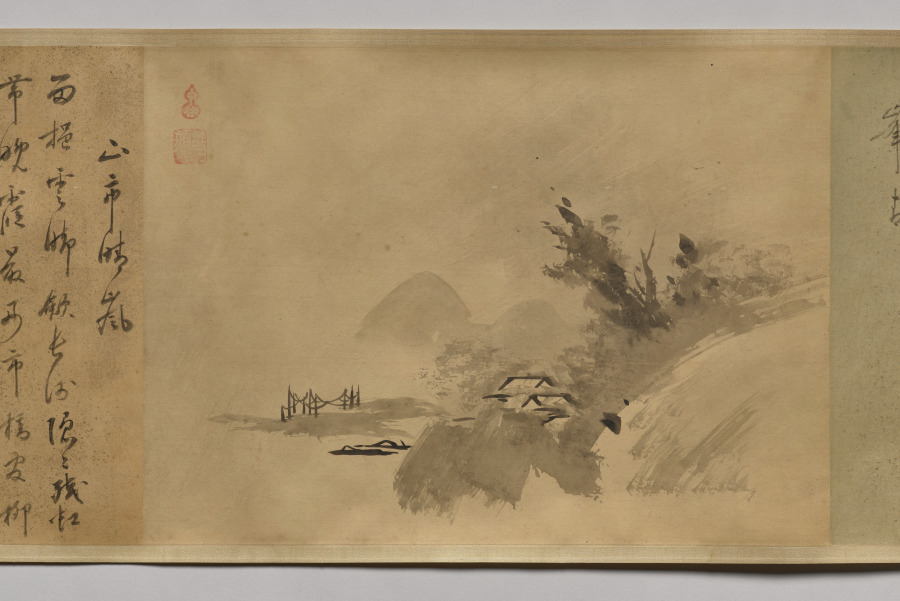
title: Poems and Pictures of the Eight Views of Xiao-Xiang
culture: Japan, Momoyama period (1573–1615)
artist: Unkoku Tōgan (Japanese, 1547–1618)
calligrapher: Inkei Gentetsu (Japanese, 1562–1612)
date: 1605–12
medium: Handscroll; ink on paper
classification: Painting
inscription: Each painting sealed with red gourd-shaped seal reading Unkoku (雲谷) and a square seal reading Tōgan (等顔).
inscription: Each painting prefaced with a titled poem on the Eight Views of Xiao-Xiang by Yujian Ruofen (active late 13th century) inscribed by Japanese Buddhist monk Inkei Gentetsu (1562–1612).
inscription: 右寫玉㵎之筆勢／雪舟末葉等顔筆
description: Unkoku Tōgan brushed these scenes using the splashed-ink technique associated in Japan with the Chinese monk Yujian Ruofen (active late 1200s). Xiao-Xiang refers to the region in present-day Hunan province, where the Xiang River and its tributaries converge. Each of the eight views evokes a time of day or season. The earliest surviving series of Xiao-Xiang paintings is by Wang Hong (active mid-1100s), but textual evidence tells us the theme appears earlier. It was later adopted in Japan and Korea, as seen here. The poems were inscribed by Inkei Gentetsu, the third abbot of the Rinzai Zen temple Tōshunji, Japan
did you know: The “Tō” of Tōgan comes from the name of painter Sesshū Tōyō (1420–1506).